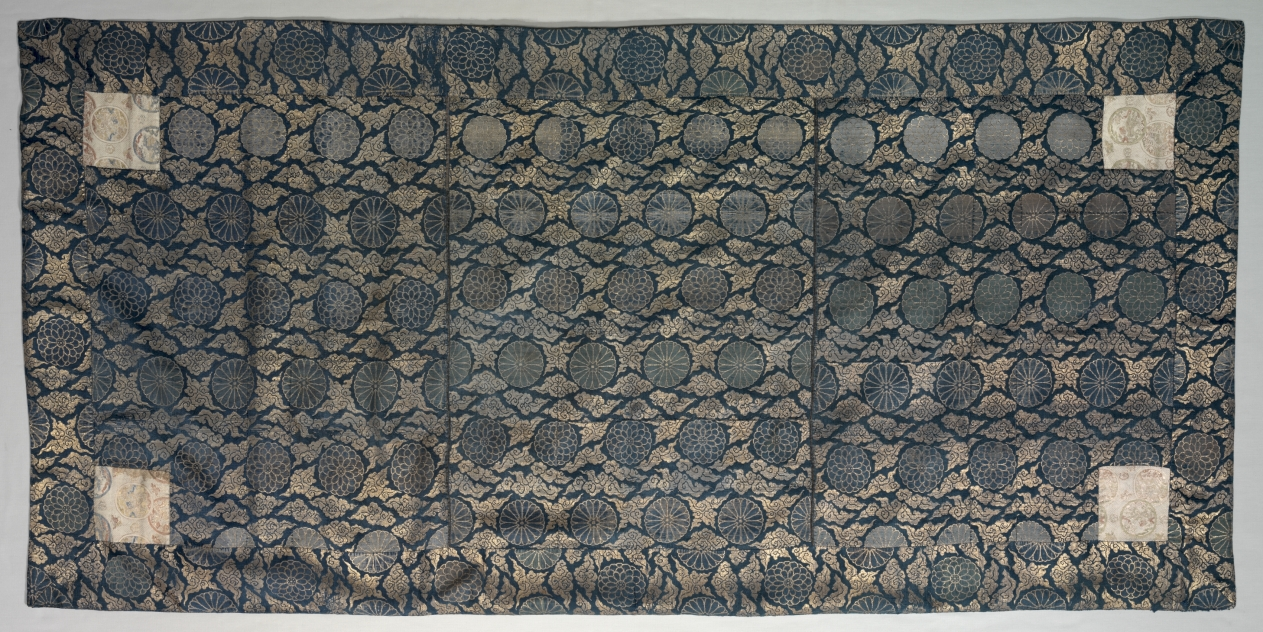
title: Buddhist Vestment (Kesa)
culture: Japan, Edo period (1615-1868) or Meiji period (1868-1912), 19th century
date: 1800s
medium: silk, gold coated flat paper, lampas weave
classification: Garment